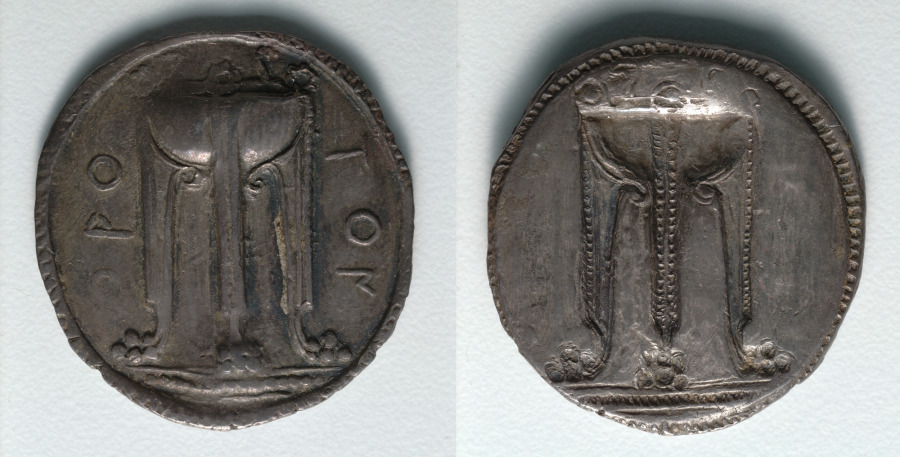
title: Stater: Tripod (obverse); Tripod Incuse (reverse)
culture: Greek, minted at Kroton (South Italy)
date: c. 530–510 BCE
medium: silver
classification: Coins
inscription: ϘΡΟ | ΤΟΝ